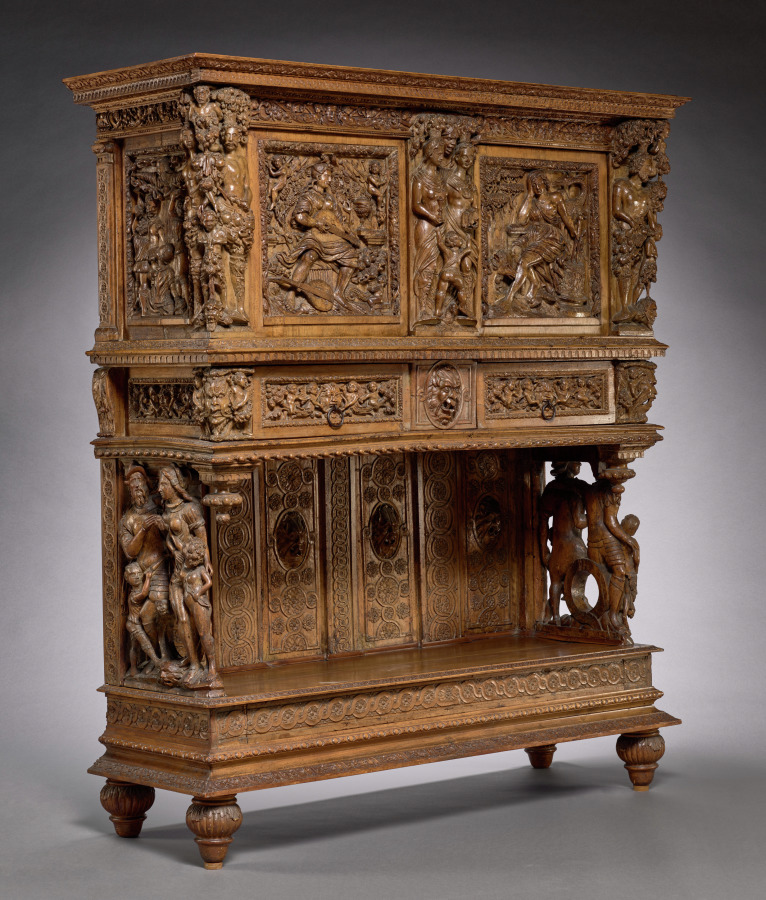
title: Dressoir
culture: France, Burgundy, 16th century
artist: style of Hugues Sambin (French, 1518–c. 1601)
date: mid 1500s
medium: walnut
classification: Furniture and woodwork